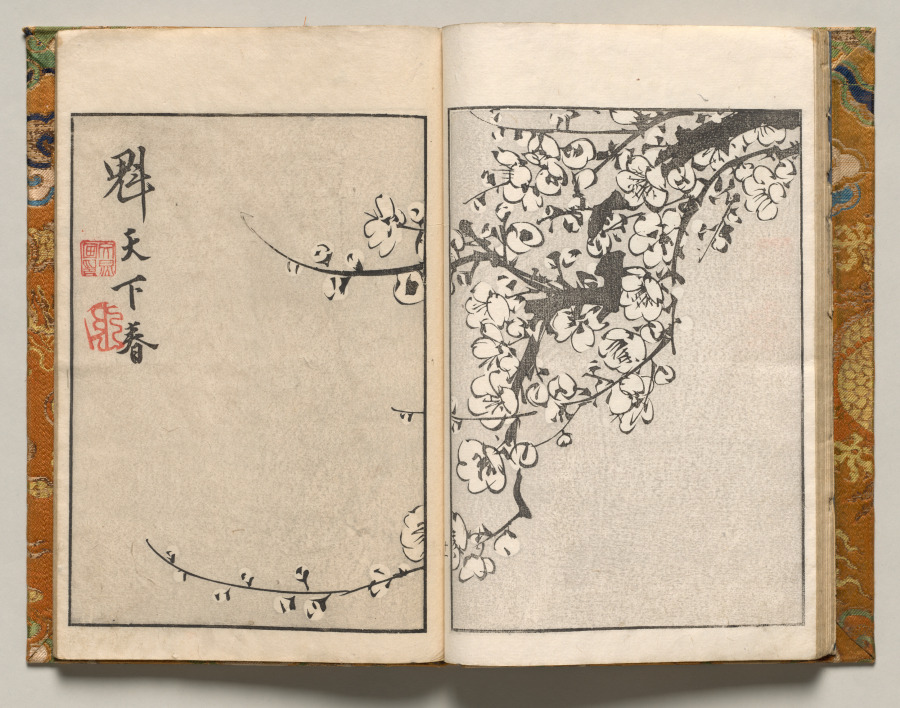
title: Spring Under Vast Skies, Design Eleven from Shazanrō Picture Book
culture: Japan, Edo period (1615–1868)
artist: Tani Bunchō (Japanese, 1763–1841)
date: 1816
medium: woodblock-printed book; ink and color on paper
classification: Bound Volume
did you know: Shazanrō was one of Tani Bunchō's style names.